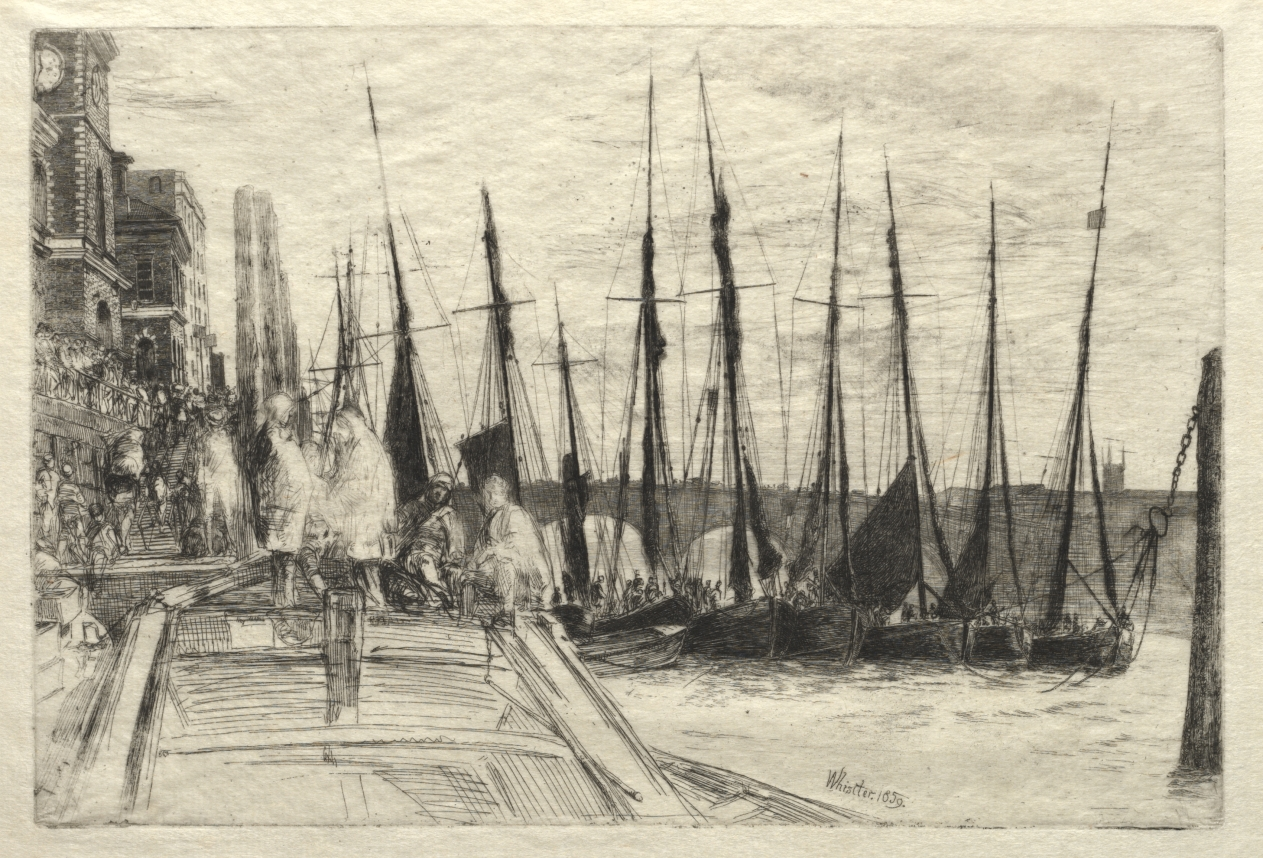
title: Billingsgate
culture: America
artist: James McNeill Whistler (American, 1834–1903)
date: 1859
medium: etching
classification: Print